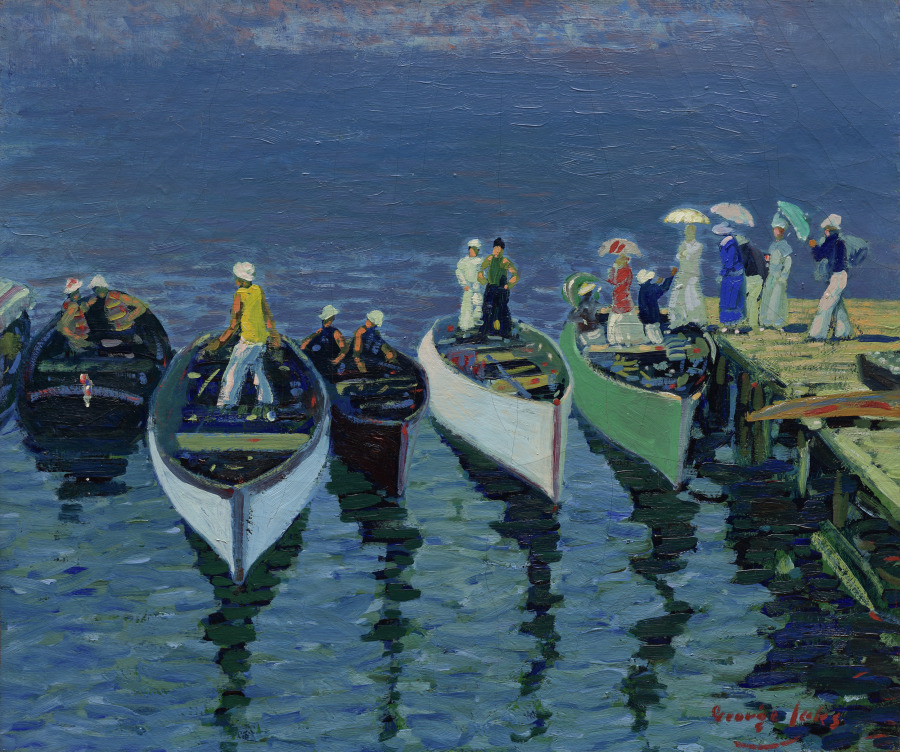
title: Holiday on the Hudson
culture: America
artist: George Luks (American, 1866–1933)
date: c. 1912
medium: oil on canvas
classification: Painting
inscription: signed lower right: George Luks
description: A sun-dappled scene of middle-class leisure, Holiday on the Hudson is an atypical work by Luks, who more often turned to gritty tenement subjects for inspiration. Throughout his career, the painter fashioned himself as a brash, profane, and hard-drinking antagonist to New York’s genteel art-world establishment. The museum purchased this work just four months before the artist was beaten to death in the wake of a speakeasy argument.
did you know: Luks often boasted about being an amateur boxing champion, but this was later revealed to be a tall tale.